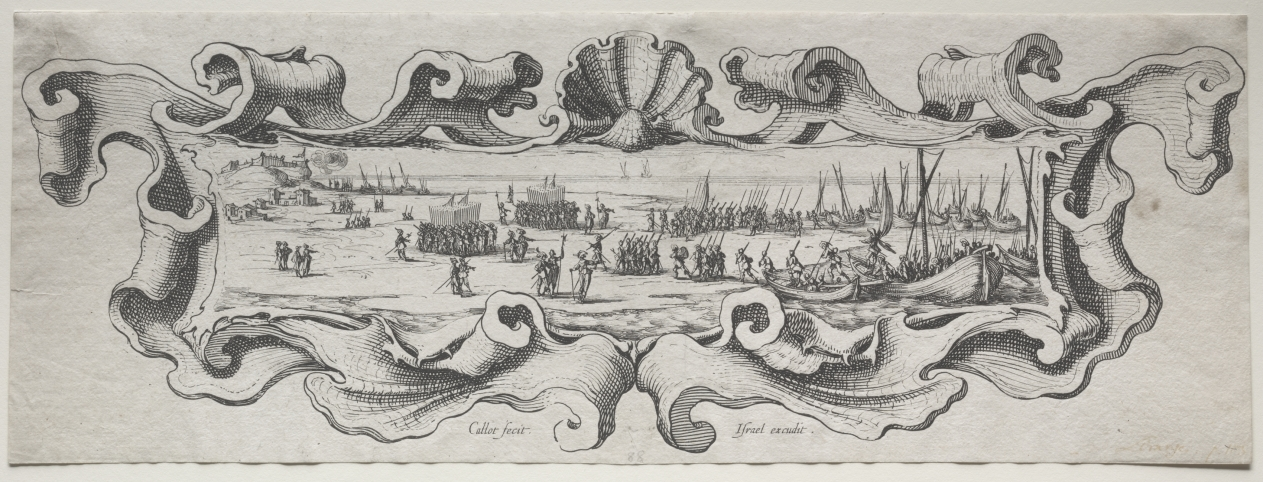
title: Le Débarquement des Troupes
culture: France, 17th century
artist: Jacques Callot (French, 1592–1635)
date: ca. 1628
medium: etching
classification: Print